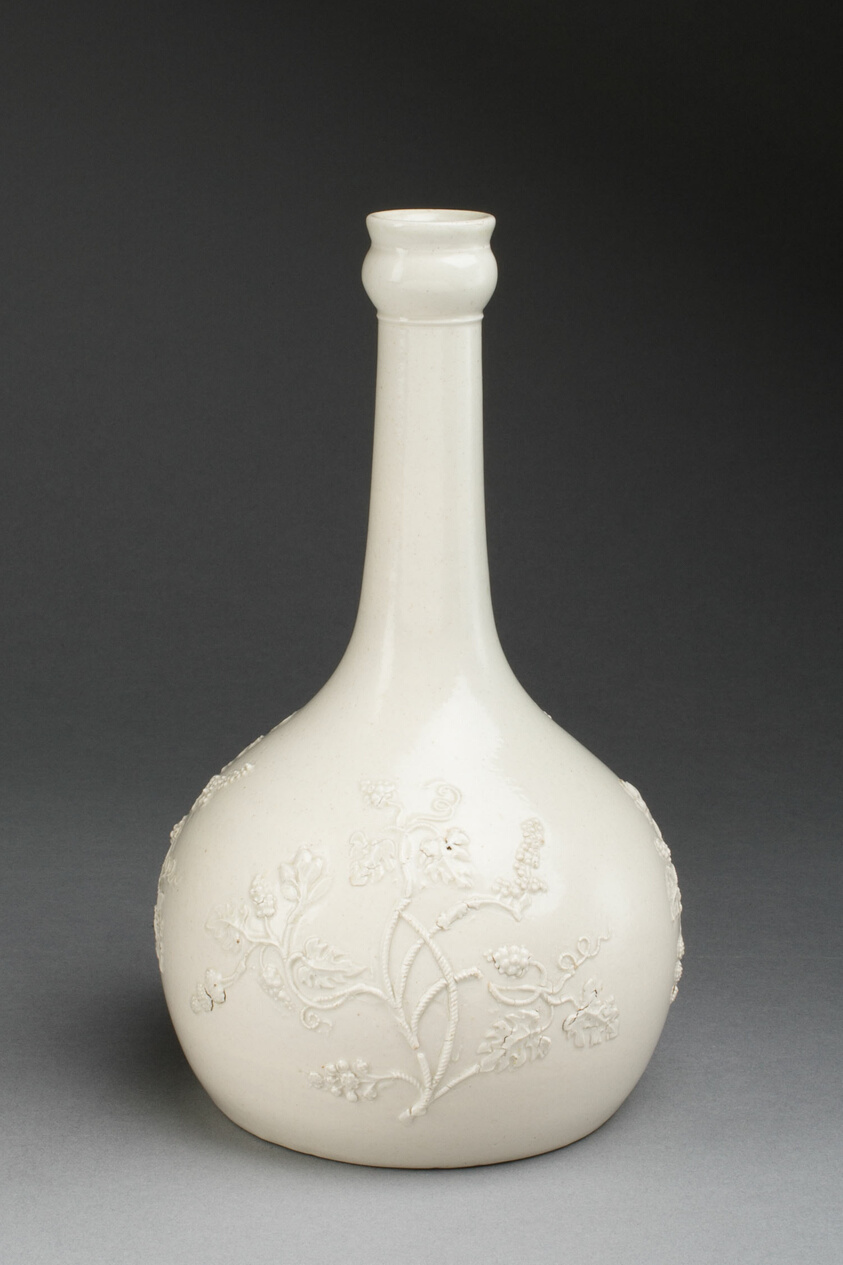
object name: Ceramics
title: Juglet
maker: Staffordshire, England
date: 1750/59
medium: Salt-glazed stoneware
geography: Staffordshire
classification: stoneware; salt-glazed stoneware; european decorative arts; ceramics